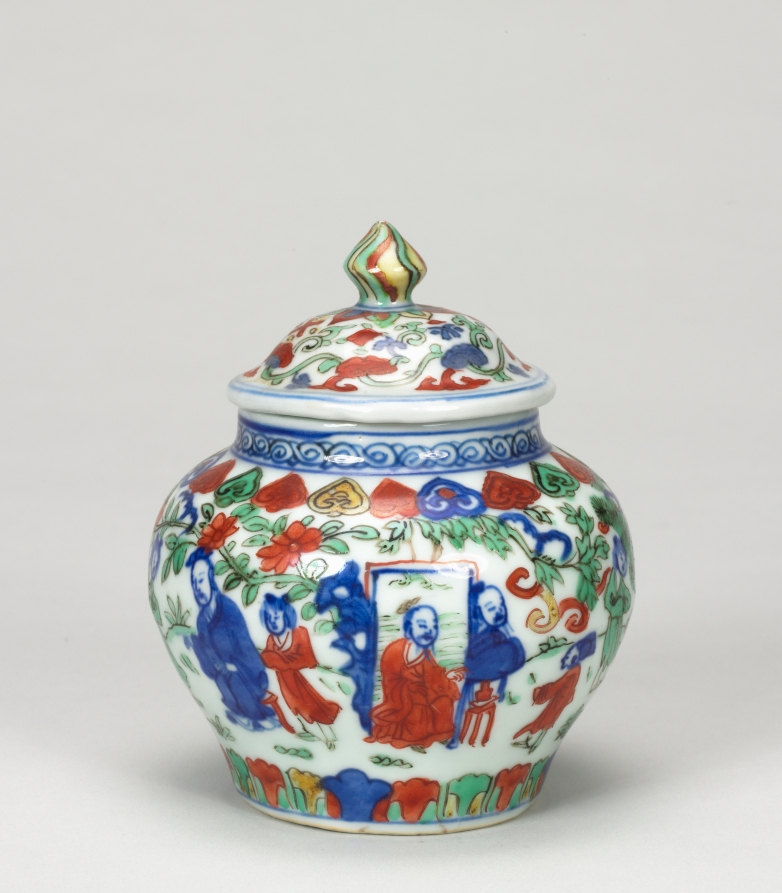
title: Covered Jar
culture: China, Jiangxi province, Jingdezhen kilns, Ming dynasty (1368-1644), Wanli reign (1573-1620)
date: 1573–1620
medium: porcelain with blue underglaze decoration and overglaze enamels in red, green, and yellow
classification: Ceramic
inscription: 大明萬曆年製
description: In the Ming (1368–1644) and Qing (1644–1911) dynasties, luxury items became more affordable to larger parts of the society, including women, merchants, and literati in non-official positions. Imperial patronage and a growing urban population encouraged consumption of luxury goods and local craftmanship. This covered porcelain jar has blue underglaze and overglaze in red, green and blue enamels. It shows Ming dynasty advancements in porcelain decoration and the creative mind of the talented artisans who made it.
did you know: This jar is painted with 16 figures of all ages enjoying a garden setting.